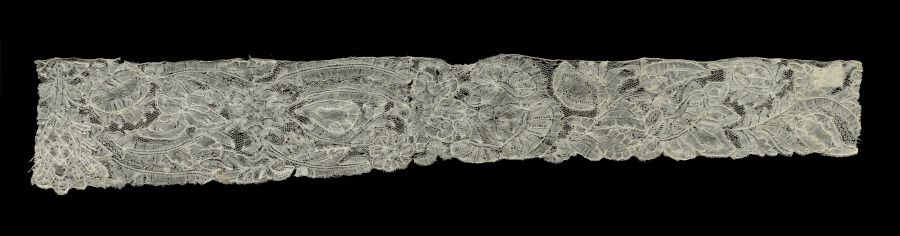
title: Edging for Cap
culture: Belgium, Brussels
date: 1700s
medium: Linen: bobbin lace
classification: Lace